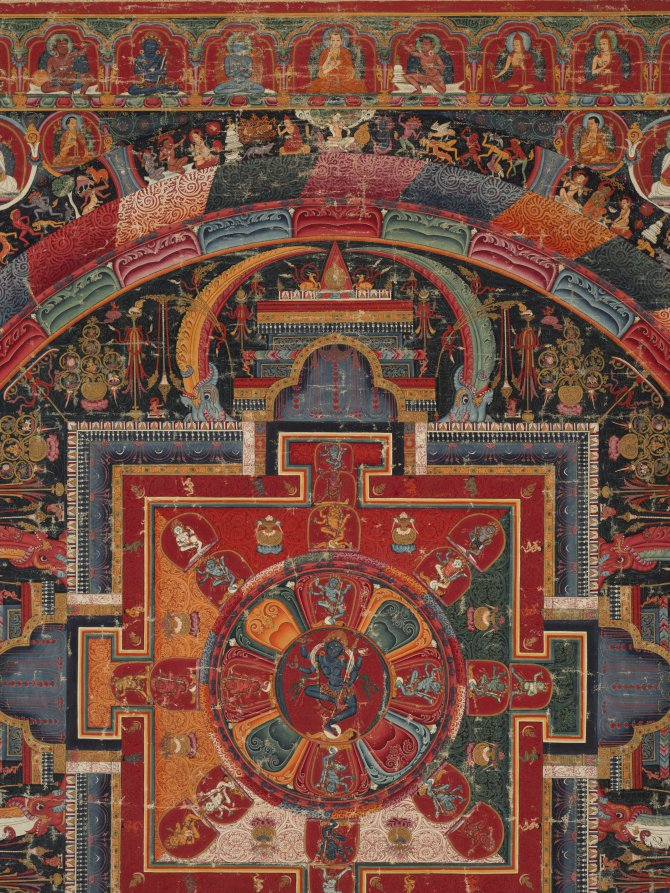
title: Twenty-three Deity Nairatma Mandala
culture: Central Tibet, Sakya-affiliated monastery, 14th century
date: c. 1375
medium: Gum tempera, ink, and gold on cloth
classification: Painting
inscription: The inscription along the bottom says: Twenty-three deity Nairatma Mandala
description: One of the main types of imagery in tantric Buddhist art is the mandala, a two-dimensional diagram of the realm of an enlightened being. This mandala depicts the palace of Nairatma, who dances in the center surrounded by her entourage. Using the painting as a guide, the tantric practitioner in meditation mentally projects the two-dimensional plan into three-dimensional space and enters into it. The outermost ring contains depictions of the cremation grounds, where corpses are being burned and consumed, as well as tantric yogis and masters who work there in order to understand the impermanence of the body, defeat their fear of death, and overcome irrational aversions to impure aspects of life. Virupa is depicted twice, always pointing to arrest the sun with his raised left hand. He sits among the row of lineage masters along the top edge, and is also depicted in the topmost segment of the ring of cremation grounds, being served a cup of liquor. Along with lineage masters at the top of this impressive painting, bodhisattvas and important masters are depicted in the spandrels, each identified by an inscription.